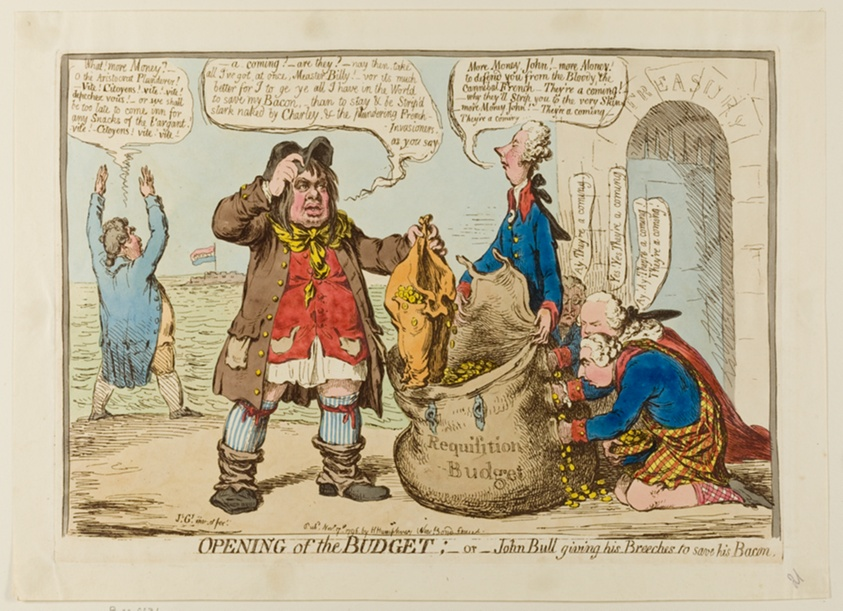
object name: Print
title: Opening of the Budget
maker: James Gillray (English, 1756-1815); published by Hannah Humphrey (English, c. 1745-1818)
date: published November 17, 1796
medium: Etching in dark brown, with handcoloring, on cream wove paper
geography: England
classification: etching; print; prints and drawing